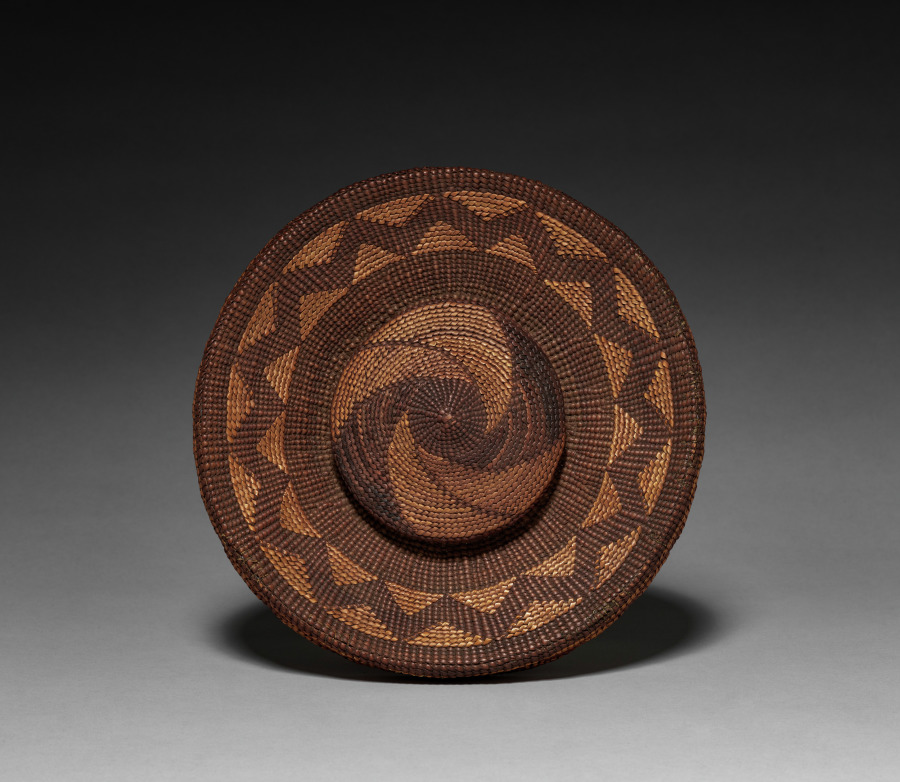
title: Basket with Raffle Top (lid)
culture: Northwest Coast, Tlingit, 20th century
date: before 1929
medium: twined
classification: Basketry